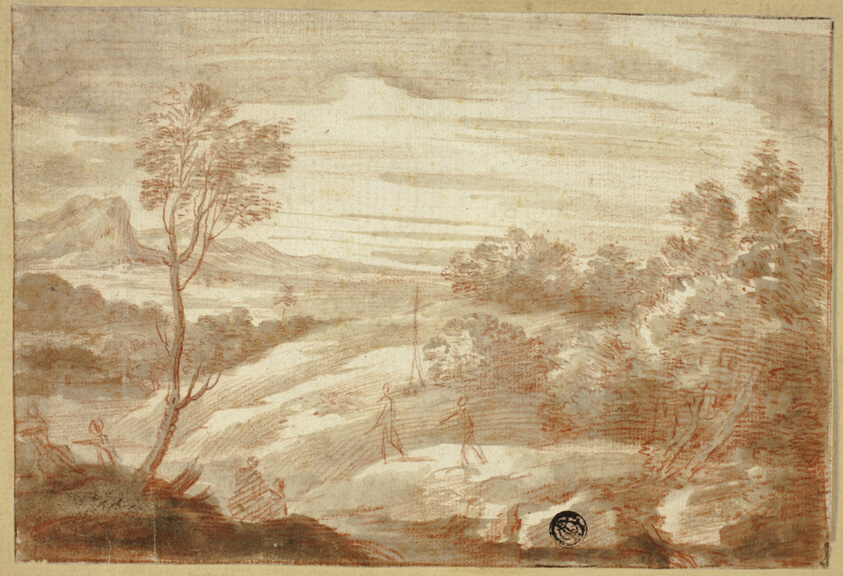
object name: Drawing and Watercolor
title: Wooded Landscape with Figures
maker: Unknown Artist; Italian, 17th century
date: 17th century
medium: Red chalk, with brush and brown wash, on ivory laid paper, tipped on tan laid paper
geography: Italy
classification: ink or chalk wash; drawings (visual works); prints and drawing